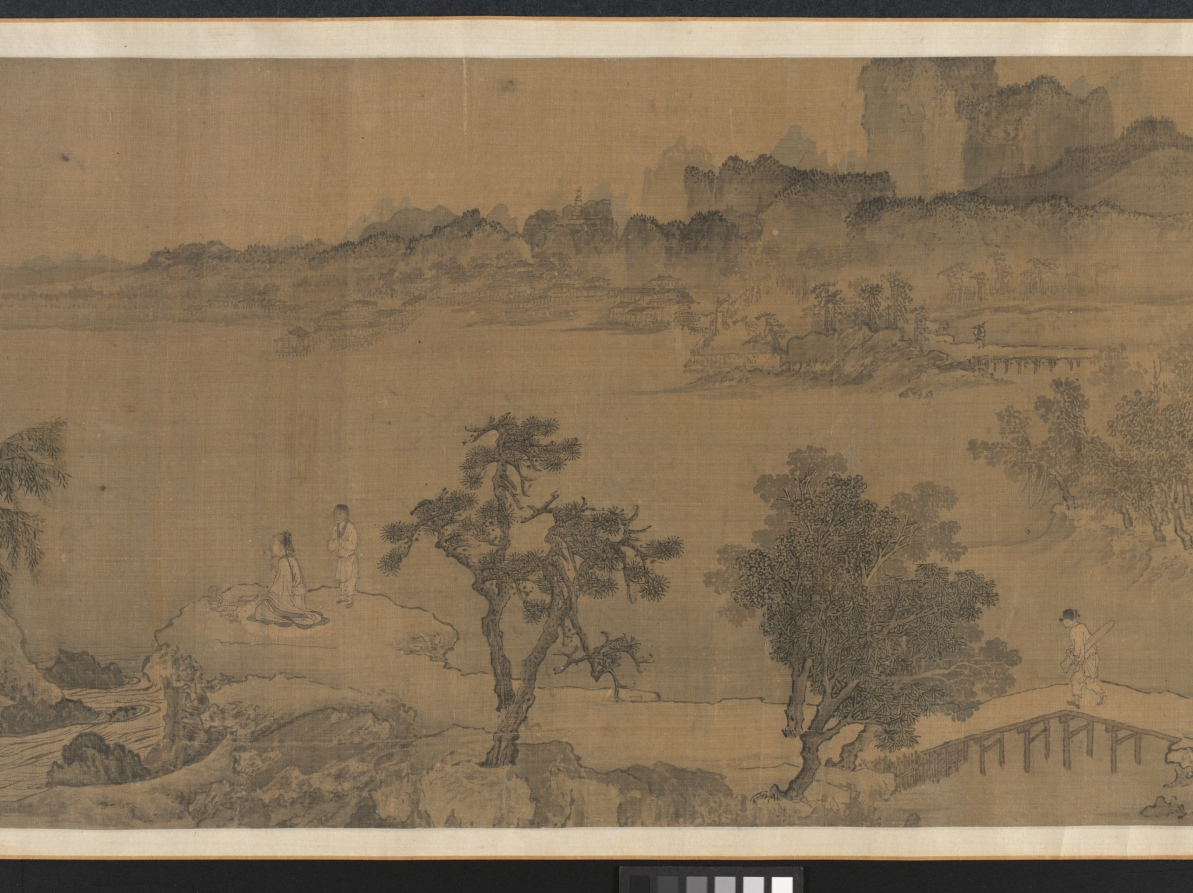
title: Tao Yuanming's Return Home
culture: China, Yuan dynasty (1271-1368)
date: 1300s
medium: Handscroll; ink and slight color on silk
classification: Painting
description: Tao Yuanming's revered poem "Return Home 歸去來辭 (Gui qu lai ci)" powerfully conveys his desire to leave bureaucratic life for the simplicity and authenticity of nature. This sentiment has deeply resonated with generations of Chinese scholars, making it a popular theme in paintings. This handscroll uses continuous narrative depicting Tao in multiple scenes from the poem. Starting on the right, the poet travels to his home. His children wait by the gate, while his wife pauses to tidy her hair before welcoming him. Then, free from the burdens of official service, Tao spends time in both nature and his cottage, where he can again enjoy wine, music, and books.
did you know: Poet Tao Yuanming 陶淵明 (c. 365–427 CE) returned to a secluded life instead of pursuing a civil service career.